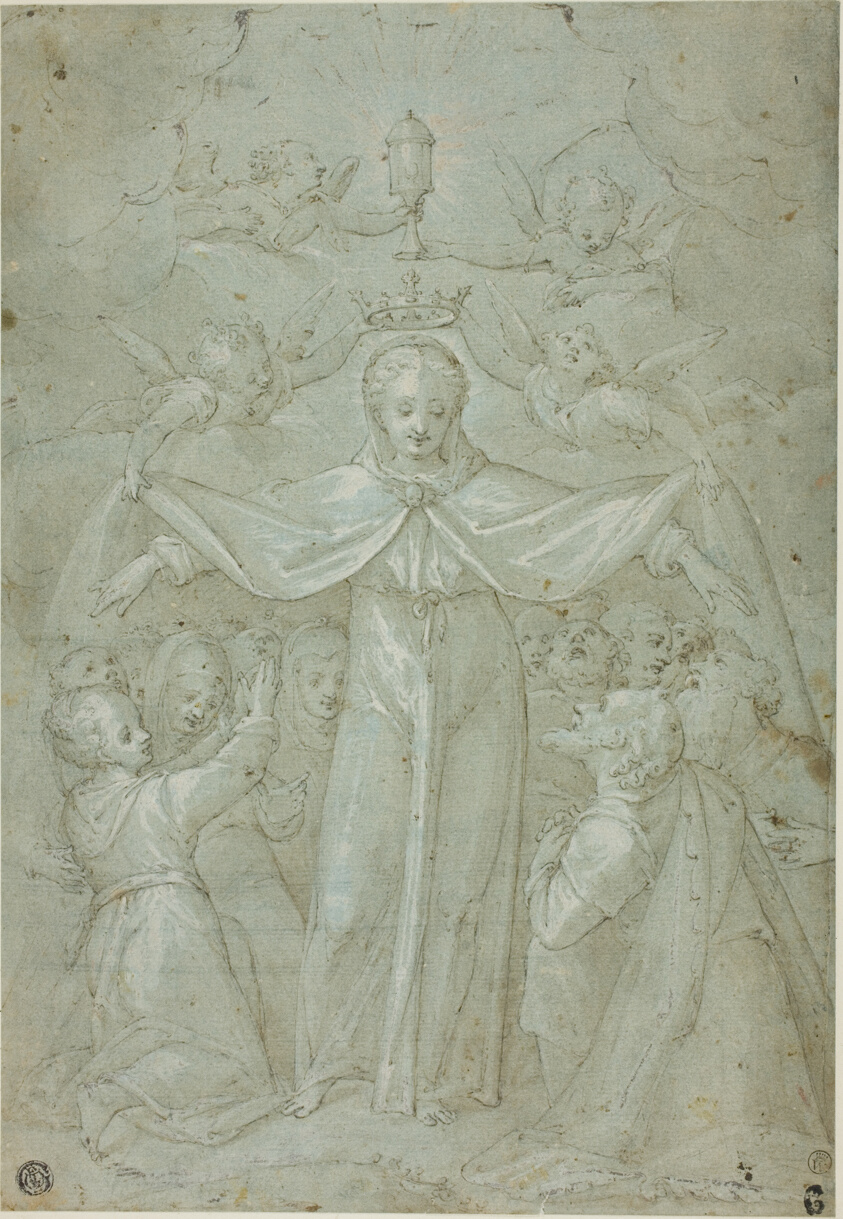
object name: Drawing and Watercolor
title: Virgin of Mercy (Madonna della Misericordia)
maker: Attributed to Filippo Bellini, or his circle; Italian, c. 1550-1603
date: c. 1590-1600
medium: Pen and black ink, with brush and gray wash, heightened with lead white (partly oxidized), on gray-blue paper, laid down on ivory wove card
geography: Italy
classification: pen and ink drawings; drawings (visual works); prints and drawing